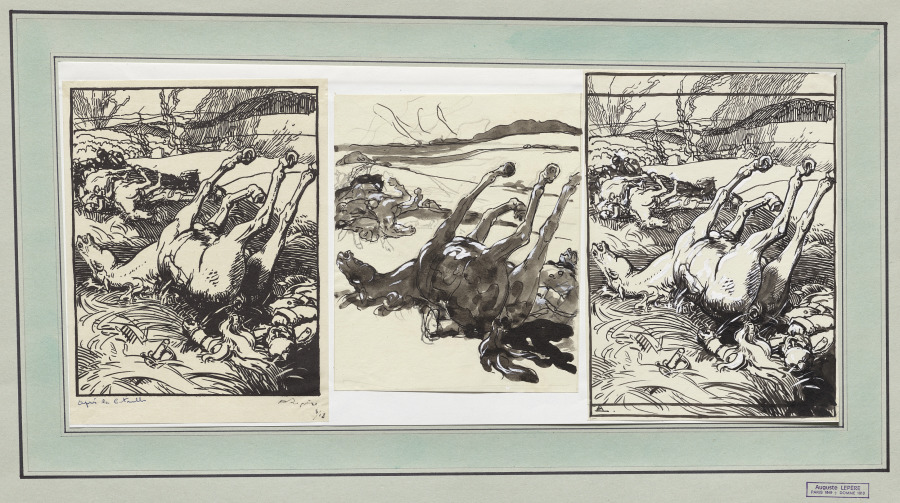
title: Après la bataille, chevaux morts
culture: France, 20th century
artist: Auguste Louis Lepère (French, 1849–1918)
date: 1914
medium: pen and brush and black ink with white highlights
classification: Drawing